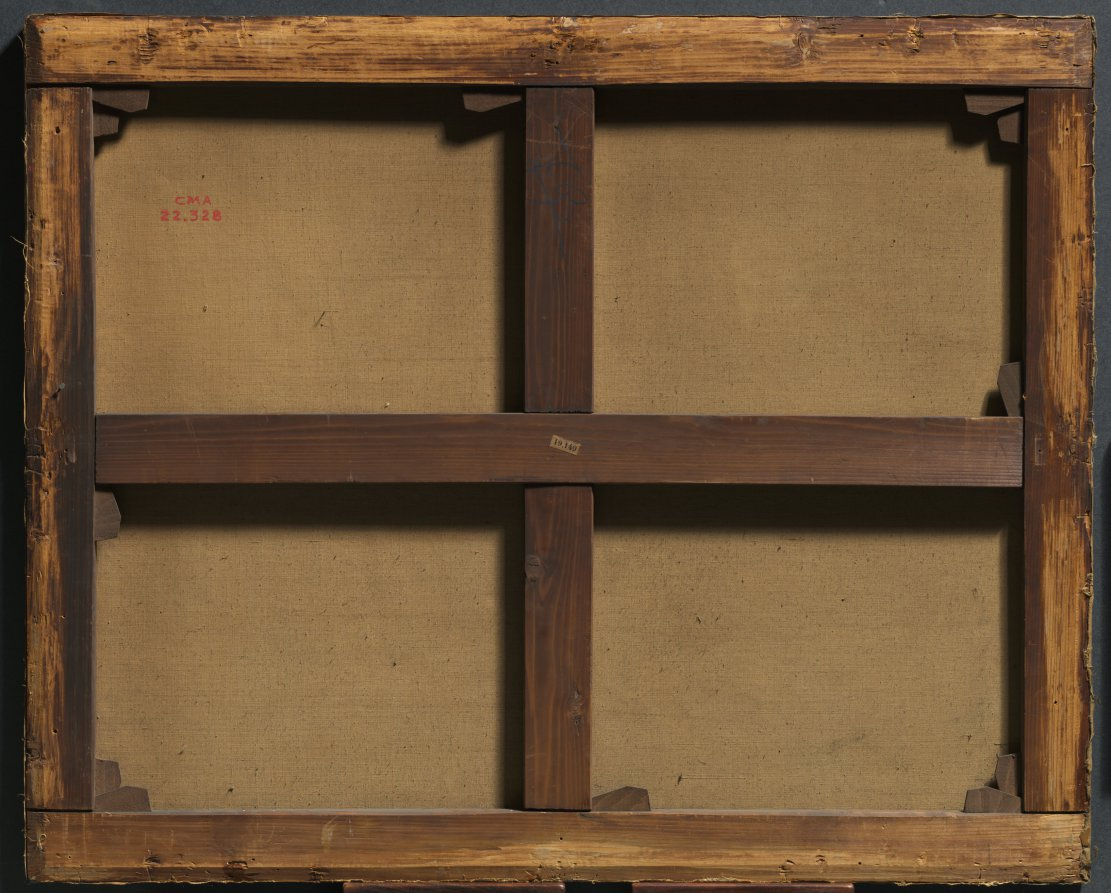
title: The Rainbow, Achères la Forêt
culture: France, 19th century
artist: Jean-Charles Cazin (French, 1841–1901)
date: 1883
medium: oil on fabric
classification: Painting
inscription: Signed lower right in brown paint: J. C. Cazin .83